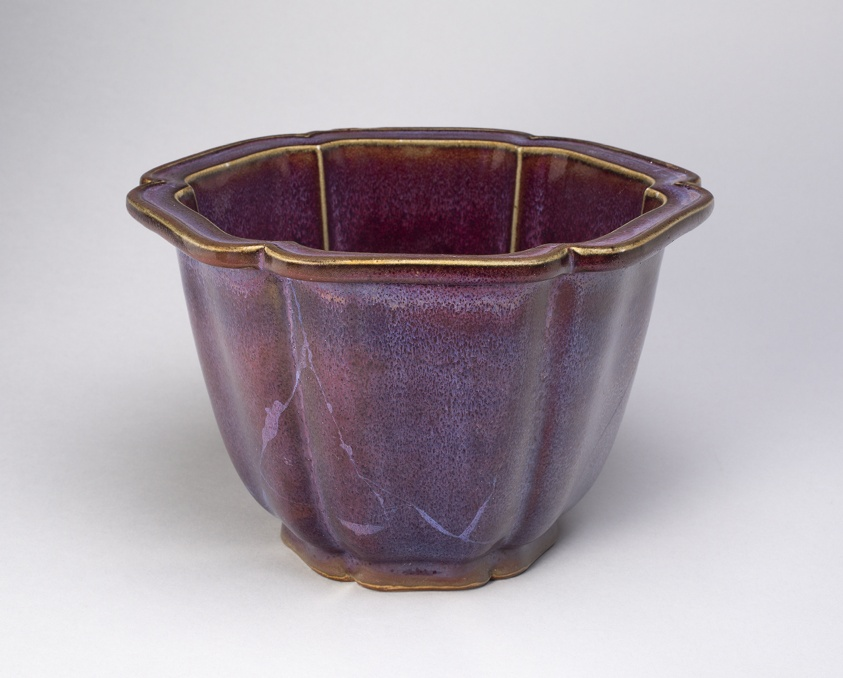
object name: Vessel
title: Lobed Flowerpot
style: Chinese (culture or style)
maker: China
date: Ming dynasty (1368–1644), 15th century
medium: Jun ware; stoneware with opaque reddish-blue glaze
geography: China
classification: stoneware; asian art; ceramics; vessel